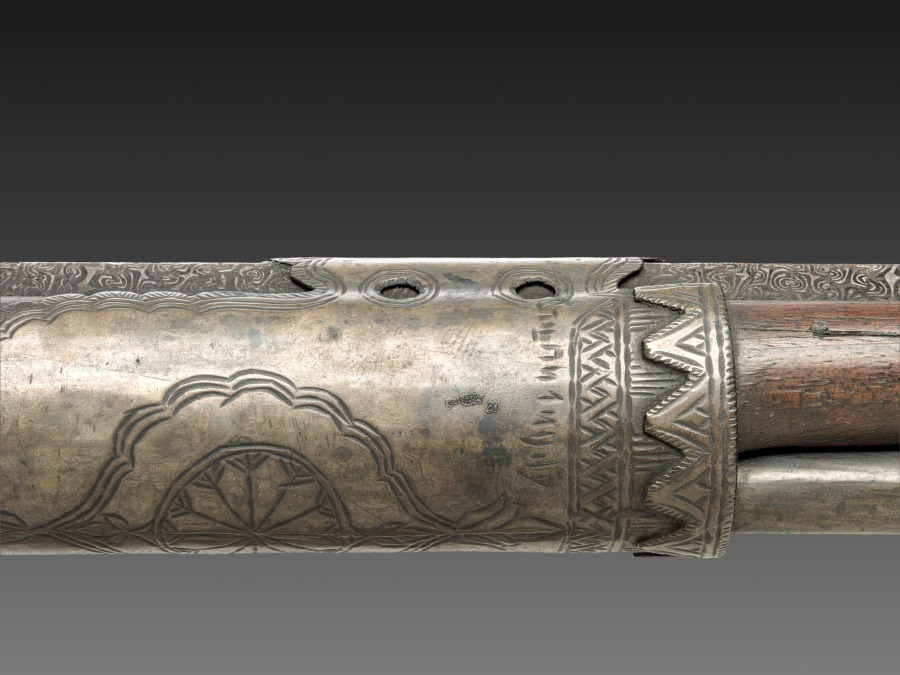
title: Matchlock Musket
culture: Turkey, Ottoman period (1299–1922)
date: c. 1750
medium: Wood, steel, brass, mother-of-pearl inlay, and leather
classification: Arms and Armor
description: Collectively, the Safavid, Mughal, and Ottoman empires are known as the Gunpowder Empires. Particularly from the 1500–1700s, they were among the strongest economic, cultural, and militaristic powers. Each trained and equipped their armies with the latest gunpowder firearms, particularly cannons and muskets. While used in battle, muskets were also used for leisure activities, particularly hunting. The decoration on this musket suggests it was a courtly item, fitted with a leather pad to protect the shooter from the force of the explosion after firing.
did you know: A matchlock musket was loaded from the muzzle end with a scouring stick kept in a sleeve on the underside of the barrel.